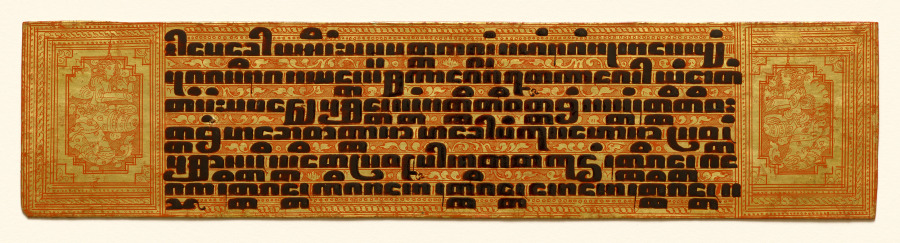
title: Text and illumination, folio 2 (recto) from a Kammavacha: Buddhist ordination text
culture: Myanmar (Burma)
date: 1800s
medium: Leaf: lacquer and gilding on cloth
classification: Manuscript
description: In premodern Burma, lay people commissioned lavishly ornamented manuscripts for ceremonial occasions, when officiants would read aloud from the text. Written in black lacquer, the text is in the language of Pali written in a Burmese script. It contains ordination rites and procedures for monastic ceremonies. The second to last page is covered with intricately drawn, winged celestial beings (nats) in gestures of praise. They fly amid intertwining vegetation—denoting bounty—that grows from serpentine forms that refer to rain clouds. Lionlike forms inhabit the space with them. The top and bottom covers are equally ornamented with jeweled floral patterning.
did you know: The Pali text of this manuscript is written in Burmese square script, which is also known as "tamarind seed script."